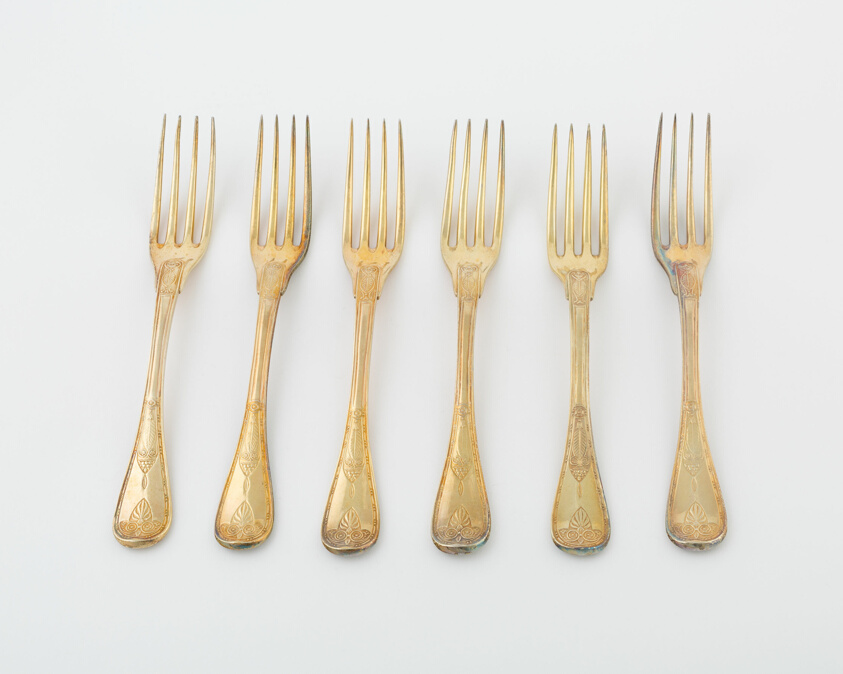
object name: Metalwork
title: Set of Dinner Forks (14)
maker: Martin-Guillaume Biennais; French, 1764-1843; Pierre-Benoît Lorillon; French, 1757-1816; Paris, France; Pietro Paola Spagna; Italian, 1793-1861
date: 1789–1820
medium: Silver gilt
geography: Paris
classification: flatware; fork (flatware); metalwork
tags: Borghese Service